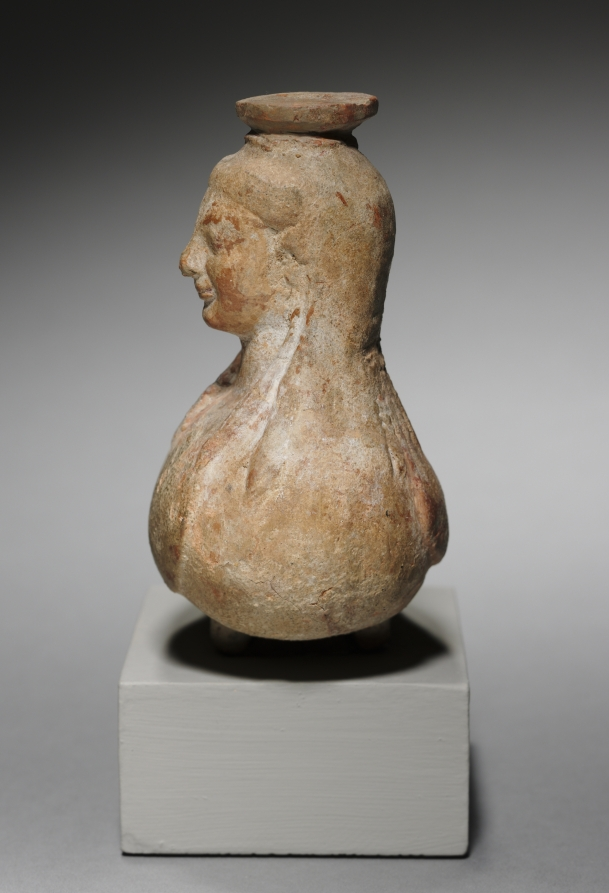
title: Siren-Shaped Perfume Flask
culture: Greece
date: 600–480 BCE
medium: terracotta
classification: Sculpture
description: A half-bird, half-woman creature, a siren lured sailors to death by the sweetness of her song. The most famous sirens appear in the ancient epic the Odyssey. Shaped like a siren, this vessel likely held valuable perfumed oil. Its small mouth limited spillage, and a string attached to the loops on its back allowed it to hand or hold a stopper.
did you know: In the Odyssey, Odysseus’s crew escapes the sirens by plugging their ears with wax.